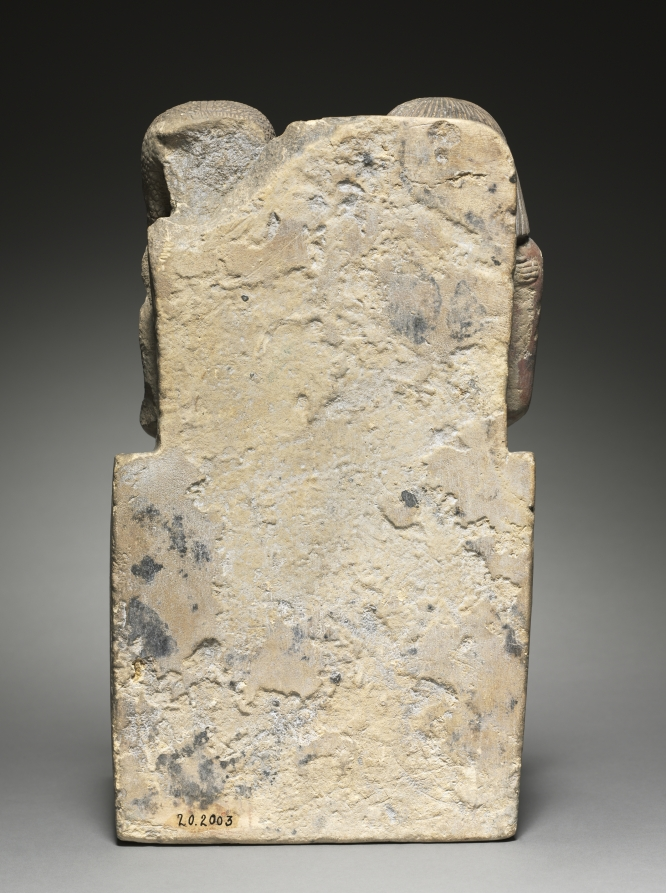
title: Seated Pair Statue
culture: Egypt, New Kingdom (1540–1069 BCE), Dynasty 18, reign of Tuthmosis III (1479–1425 BCE)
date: c. 1479–1425 BCE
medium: painted limestone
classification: Sculpture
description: Ka statues were the dwelling places for the spirits of the deceased. These sculptures—some larger than life-size—were placed in a niche in the back of the tomb.